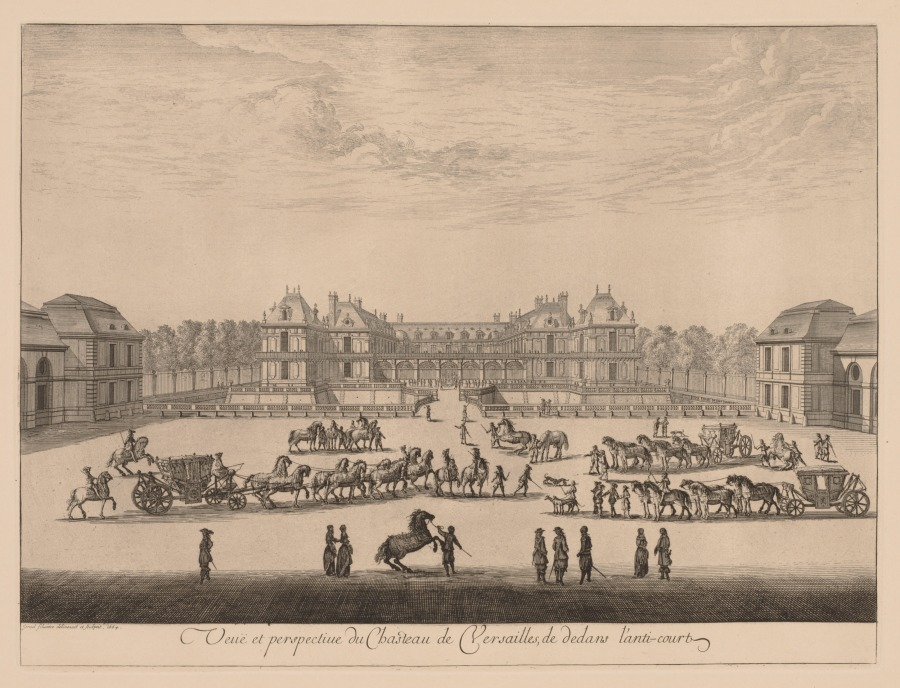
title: Vue et perspective du Château de Versailles, de dedans l'anti-cour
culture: France, 17th century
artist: Israël Silvestre (French, 1621–1691)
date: 1664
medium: engraving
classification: Print